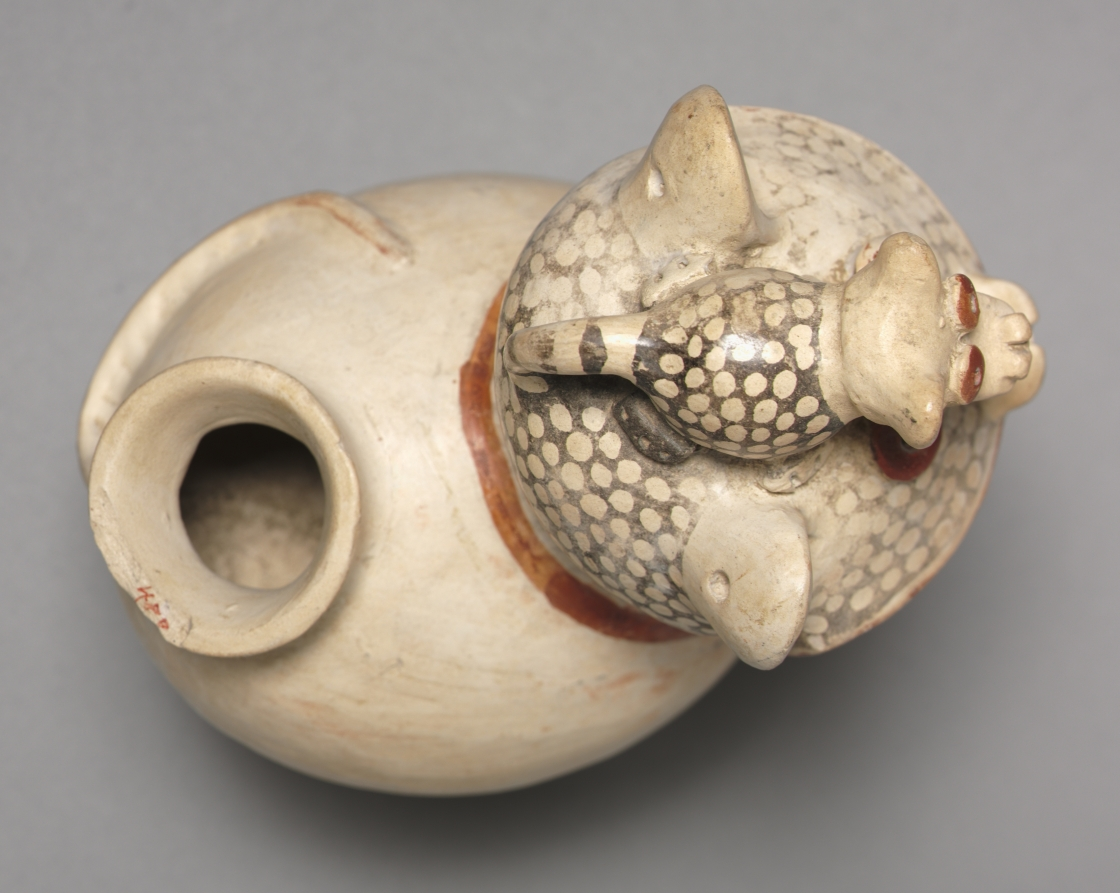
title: Feline Vessel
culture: Central Andes, North Highlands, Recuay people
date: 1–700 CE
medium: ceramic, red and white slips, black pigment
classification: Ceramic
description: Recuay art is under-studied and it is difficult to know the meaning of the wonderfully stylized feline on whose head perches a small passenger that may be a coatimundi, a nosy, busy, racoon-like animal. Elsewhere in Recuay art, felines are shown as virile predators, making it likely that in general they were symbols of leadership. The feline is painted with white and red slips; after firing, a resist application of black pigment was used to create the dotted pattern.